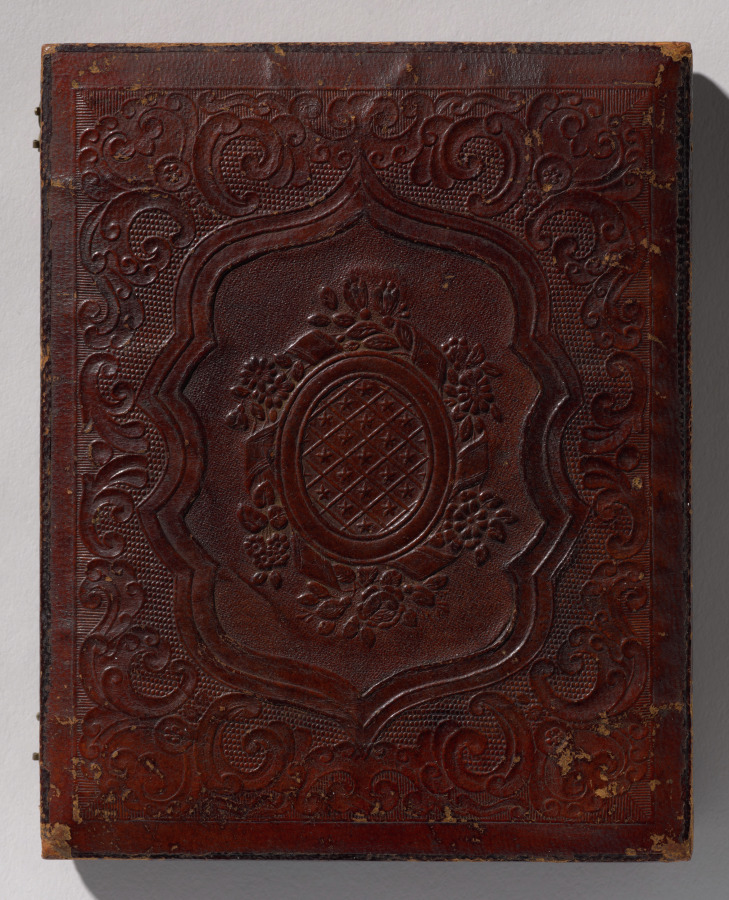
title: St. Anthony Falls from Across the River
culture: America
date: c. 1853–54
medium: daguerreotype, half-plate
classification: Photograph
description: In this image of St. Anthony Falls, the unidentified daguerreotypist made an "instantaneous view" of a remarkable natural wonder, rendering its specific geological formation with exacting clarity. Above a narrow channel where the Mississippi River runs between steep bluffs in Minneapolis, Minnesota, the falls churns away at the bedrock over which it descends. Named by Father Louis Hennepin during his travels in 1680, it is the only significant waterfall on the entire Mississippi River. The specific motivations of the photographer remain unknown. He or she may have wished the photograph to be scientific and documentary, a valuable visual aid for an artist, or just a reminder to a curious resident. No doubt, this daguerreotype was a rare image of the environment's unspoiled condition before the mid 1850s, when demand for an inexpensive energy source irreparably changed this area from a natural to industrial landscape.